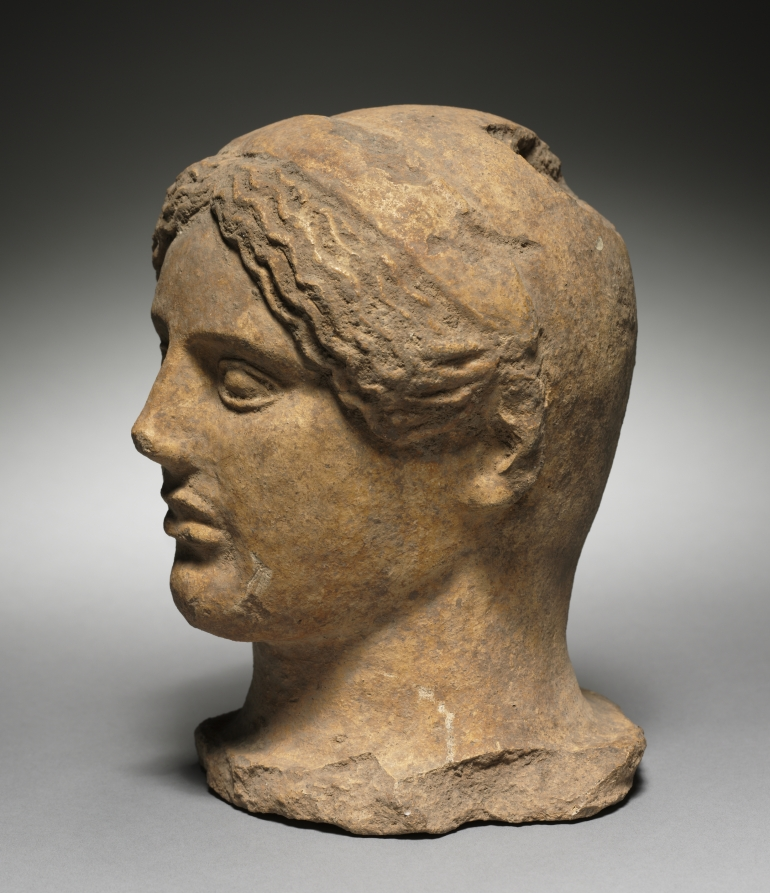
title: Head of a Woman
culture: Etruscan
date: 500–475 BCE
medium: terracotta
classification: Sculpture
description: Probably created for use as a votive dedication, or an offering to a deity, this mold-made female head tops a broad neck spreading into a flat base; no bust or body was intended. The wavy hair, parted in the center, drapes before the ears and beneath a simple headband, framing the face and emphasizing the frontal view. Although three-dimensional, the head is unworked on its back half.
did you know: This sculpture is an example of ancient mass production, as many identical heads could be made from one mold.